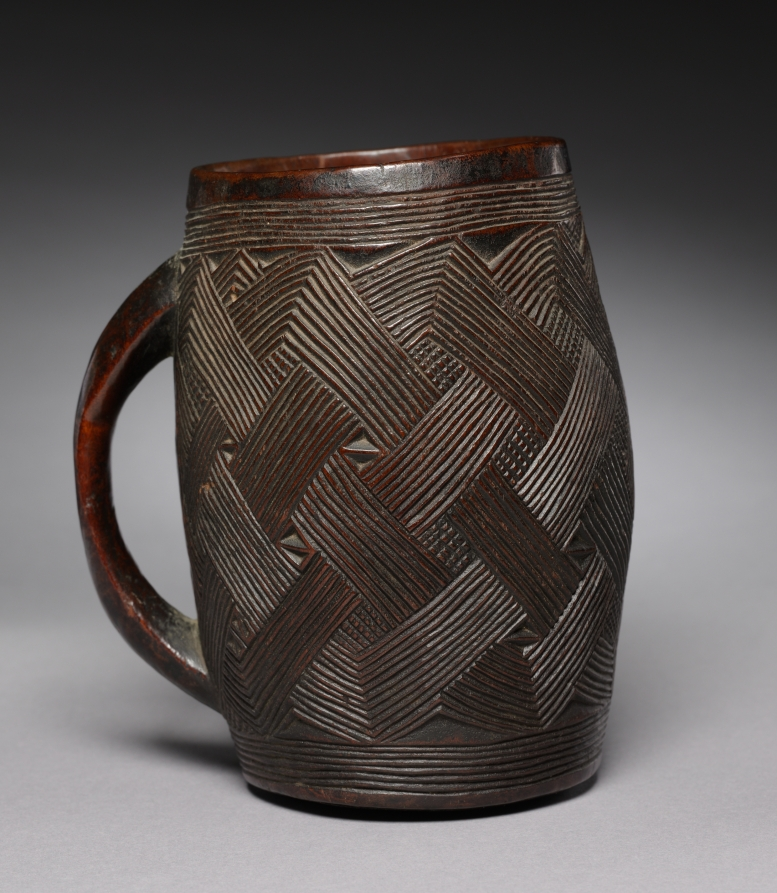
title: Cup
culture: Democratic Republic of the Congo, Kuba, 20th century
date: 1900s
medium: Wood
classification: Vessels